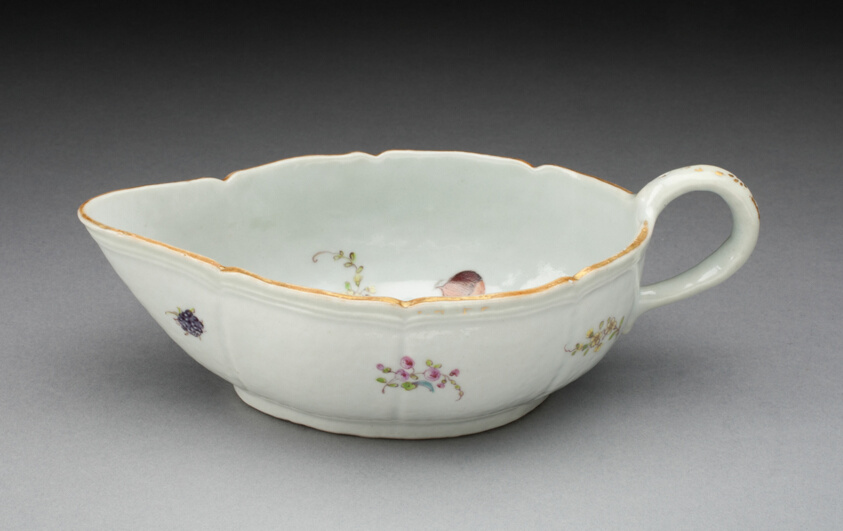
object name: Ceramics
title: Sauceboat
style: chinese export, Chinese (culture or style), East Asian, asian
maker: China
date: c. 1750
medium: Hard-paste porcelain with polychrome enamels and gilding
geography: Jingdezhen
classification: chinese export porcelain; porcelain; european decorative arts; ceramics